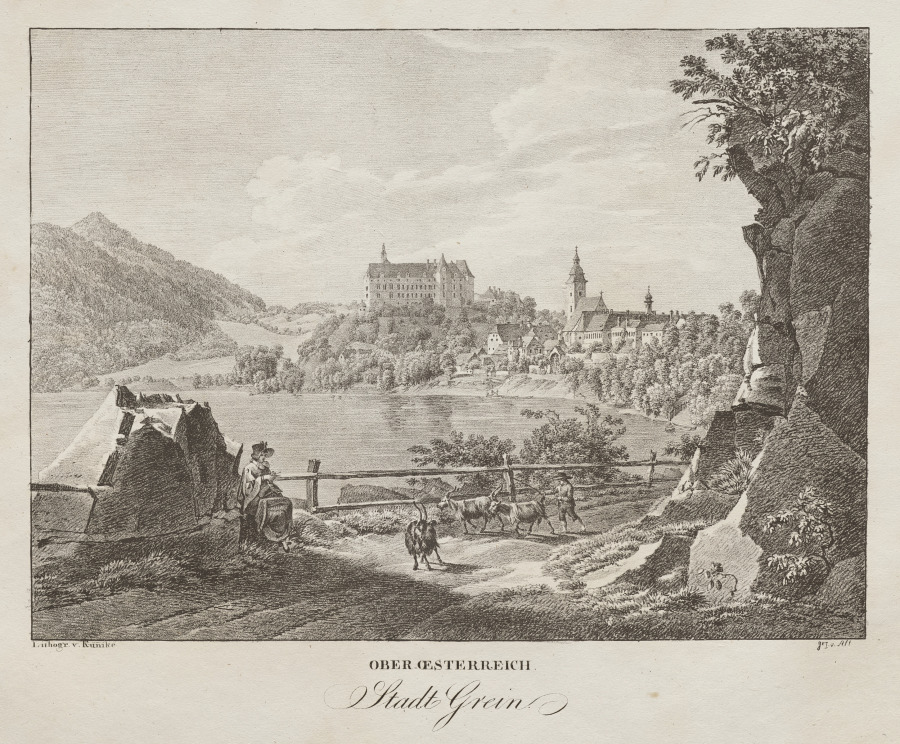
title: Ober-oesterreich, Stadt Grein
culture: Austria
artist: Jakob Alt (Austrian, 1789–1872)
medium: lithograph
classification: Print